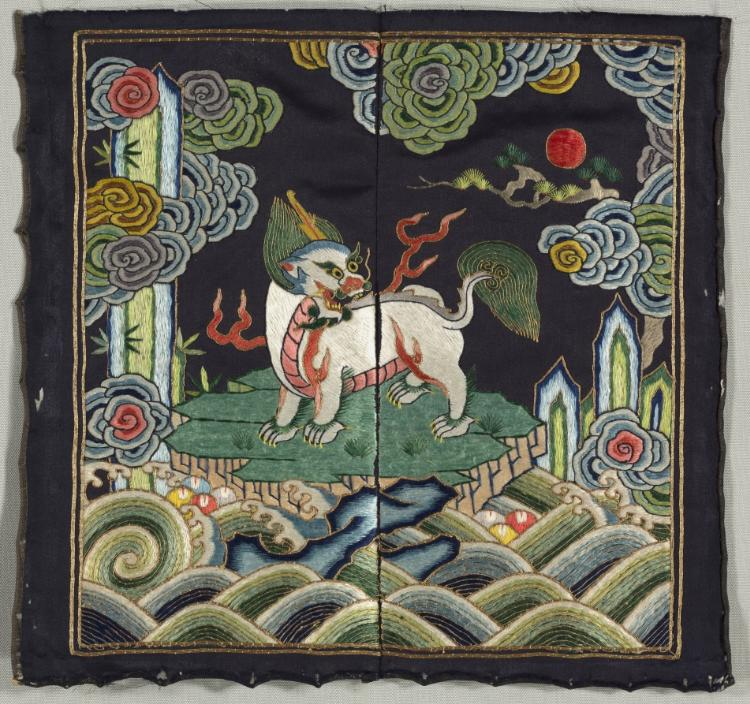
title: Rank Badge (buzi)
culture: China, Qing dynasty (1644–1911), Qianlong reign (1736–95)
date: 1736–95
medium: silk, satin weave; silk and metal thread embroidery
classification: Embroidery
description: Rank badges (also called rank insignia or Mandarin squares) were used in China during the Ming (1368–1644) and Qing (1644–1911) dynasties to demonstrate the wearer’s rank. In 1391, new clothing regulations directed court officials to wear decorative squares indicating their rank—birds for civil officials and animals for military officials. During the Qing dynasty rank badge design was regulated, and certain creatures were associated with specific ranks. Qing badges depict a representation of the universe with a landscape and a central creature, surrounded by clouds and facing the sun. The sun represented the emperor and this composition showed the official’s loyalty to him. An official’s wife wore rank badges that mirrored her husband’s. Most of the examples in CMA’s collection depict creatures facing a sun on the left. Attached to the front and back of a ceremonial robe, rank badges were woven in pairs with identical imagery. One was divided vertically up the center to attach to the front of a robe with a center opening. Rank badges are generally square or rectangular, although round examples exist. They are typically satin weave or slit tapestry weave (kesi) silk. Satin weave badges often have dark backgrounds with silk and/or metal thread embroidery. Some badges incorporate peacock feathers or beads. Late in the Qing dynasty appliqué replaced embroidery to allow for quicker production and a change in rank.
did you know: A mythical, deerlike creature with a single horn, called a xiezhi, would adorn the rank badge for a censor of the imperial government.